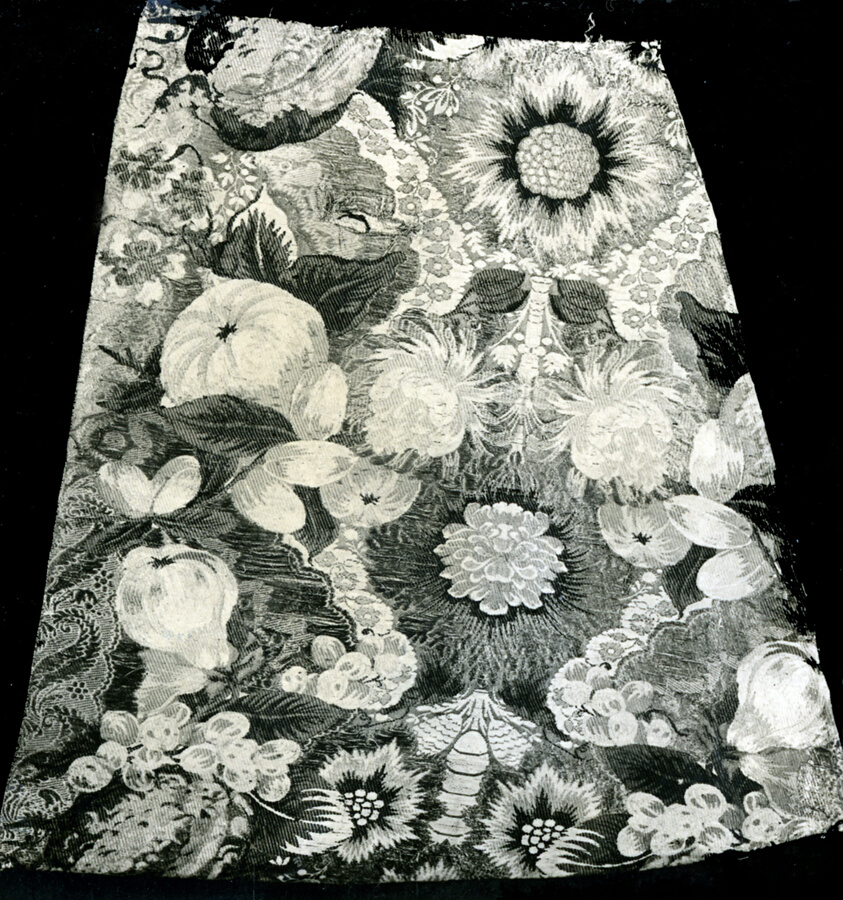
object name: Textile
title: 17 Fragments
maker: France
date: 18th century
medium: silk, brocaded in silk and metal thread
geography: France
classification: textile; weaving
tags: flowers, fruit